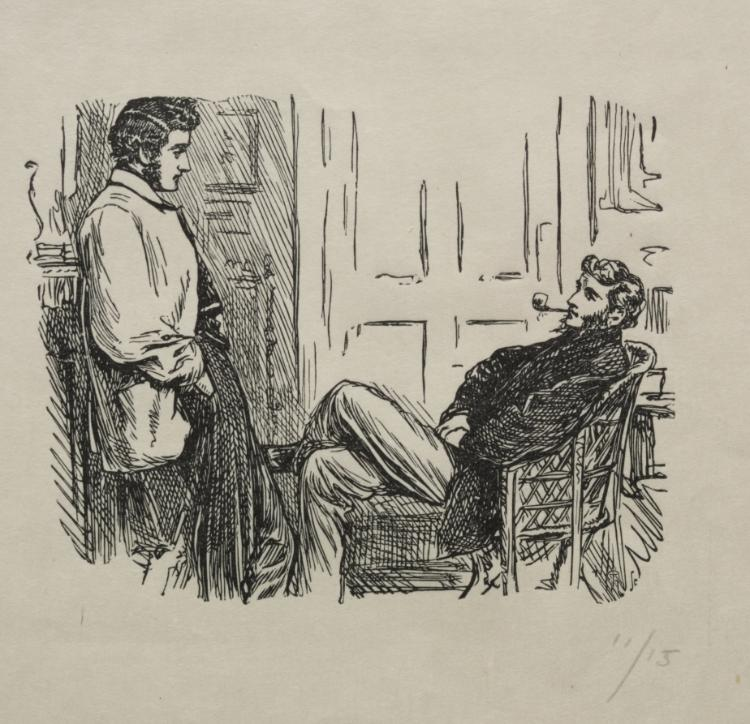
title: The Queen of Diamonds - How She Was Won and Lost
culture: England, 19th century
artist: George Louis Palmella Busson Du Maurier (British, 1834–1896)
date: 1866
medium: wood engraving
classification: Print